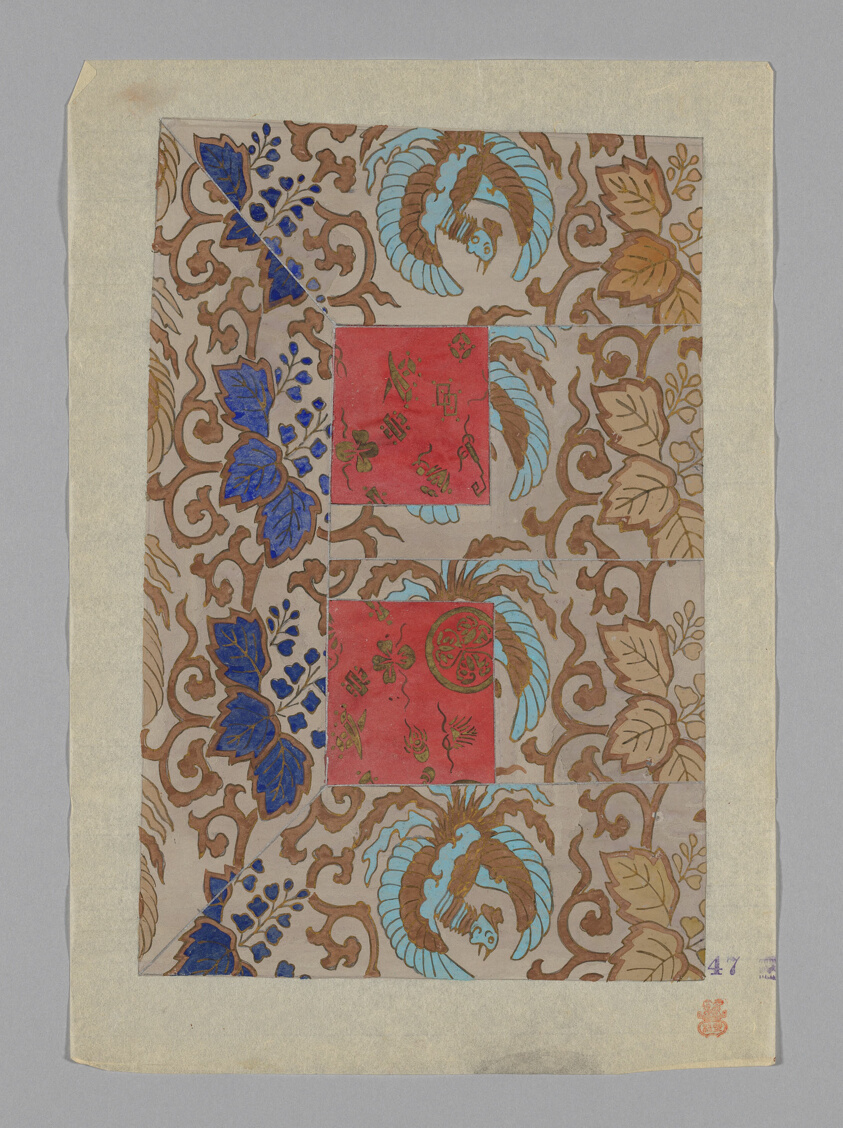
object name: Drawing and Watercolor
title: Design on Paper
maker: Japan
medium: Paper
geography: Japan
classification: textile; accessory - paper design; watercolor; paper